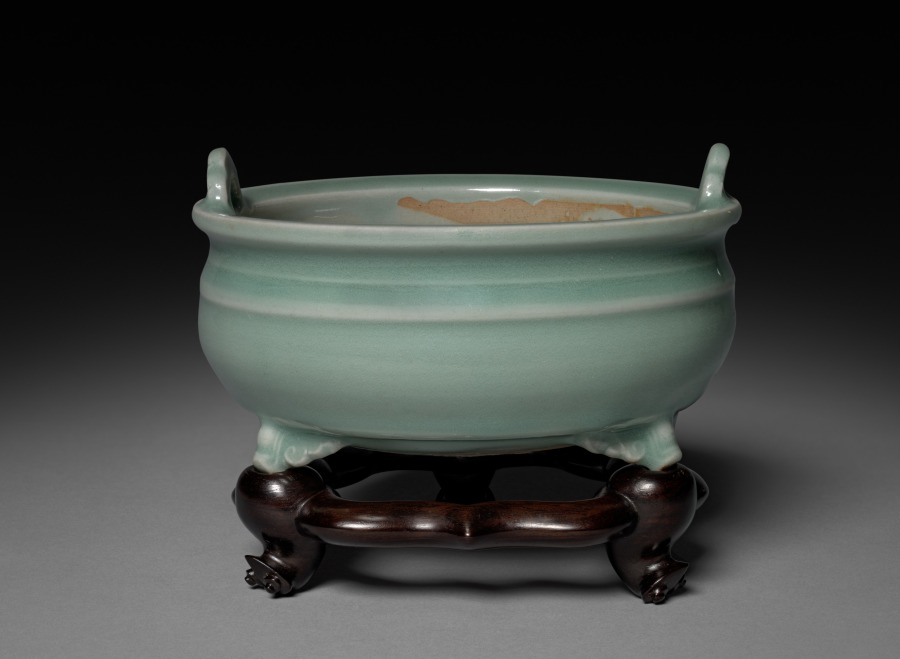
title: Incense Burner: Longquan Ware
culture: China, Southern Song dynasty (1127-1279)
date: S. Sung-Yuan Dynasty, 13th-14th Century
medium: glazed porcelain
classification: Ceramic